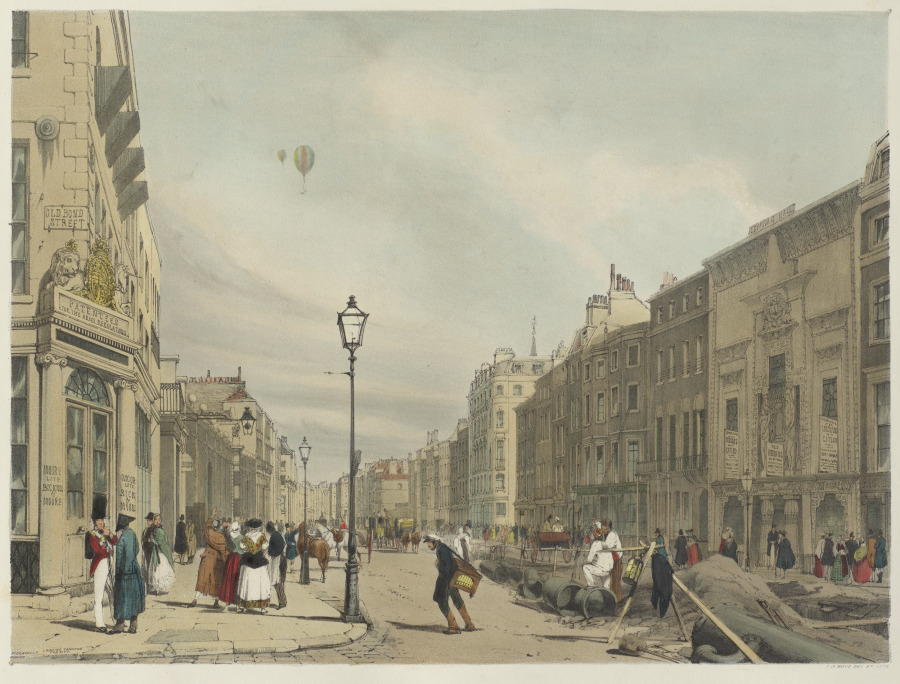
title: London As It Is: Piccadilly, looking Eastward towards the City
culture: England, 19th century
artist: Thomas Shotter Boys (British, 1803–1874)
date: 1842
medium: lithograph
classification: Bound Volume